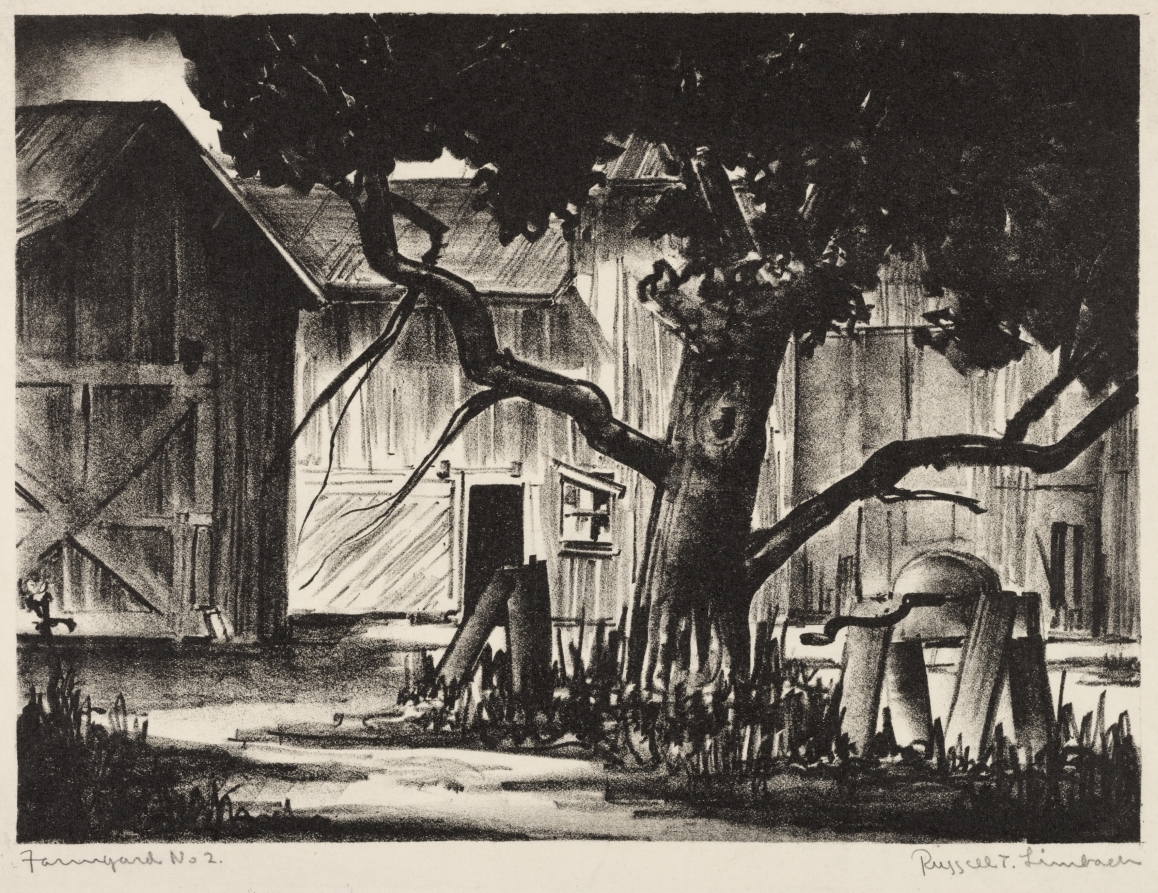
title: Farmyard No. 2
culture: America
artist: Russell T. Limbach (American, 1904–1971)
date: c. 1928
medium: lithograph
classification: Print